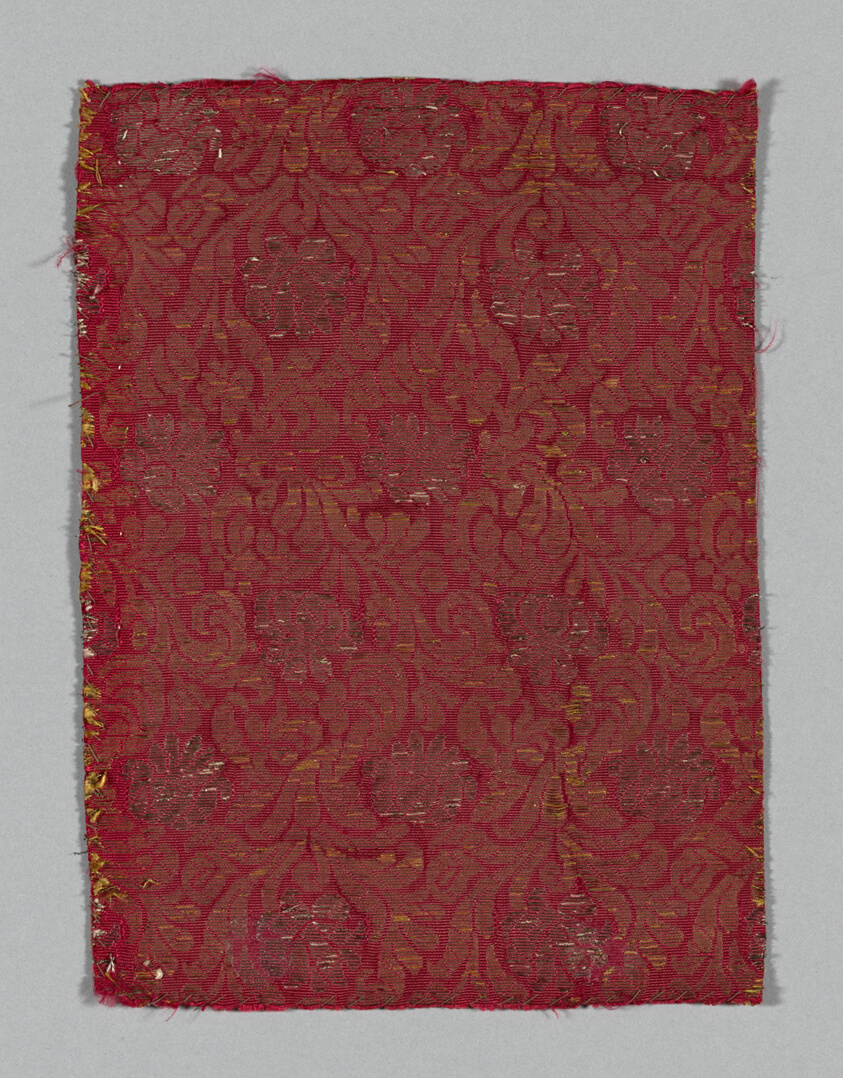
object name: Textile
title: Fragment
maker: Italy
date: 1601/25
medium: Brocaded plain compound silk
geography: Italy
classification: textile; weaving